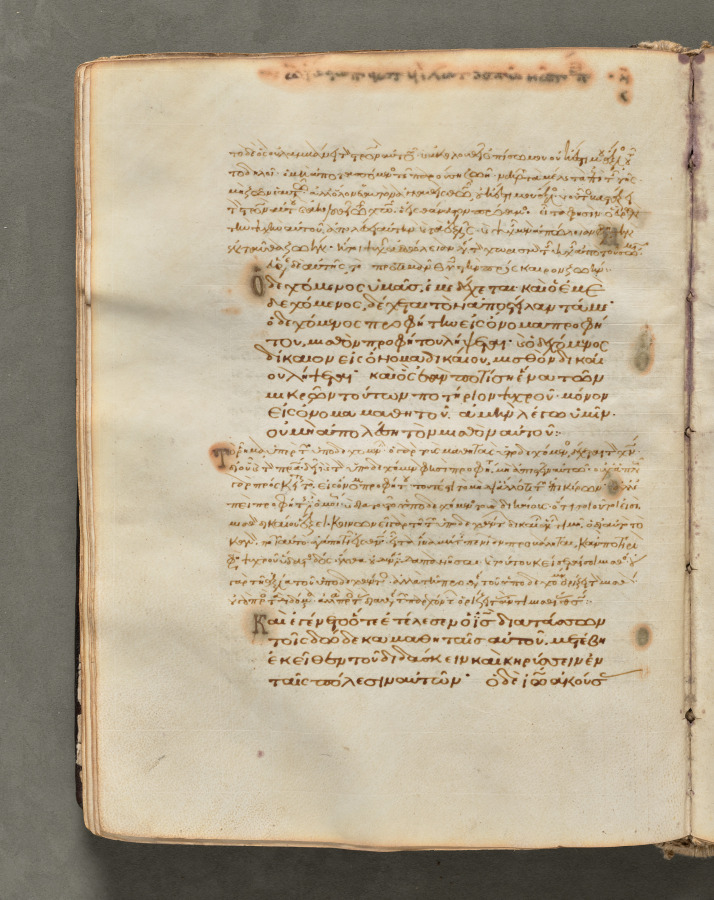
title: Text, folio 46 (verso), from a Gospel Book with Commentaries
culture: Byzantium, Constantinople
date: c. 1000–1100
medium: ink, tempera, and gold on vellum; leather binding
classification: Bound Volume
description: Each of the four gospels in this book opens on a page with brilliantly illuminated borders depicting the author of the text as well as birds-principally peacocks, symbols of the immortality of the soul-and fountains, representing the fountain of life and the salvation of the soul. This volume consists of 428 leaves with texts in Greek. Its level of sophistication suggests that it was probably written and decorated in a monastery in Constantinople.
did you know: Gospel Books were carried in procession through Byzantine churches.